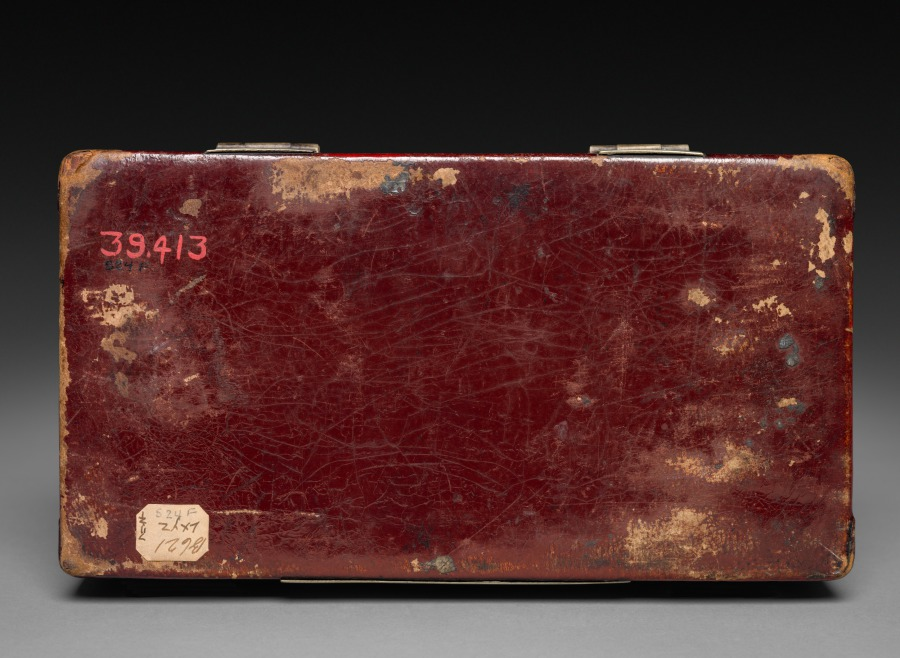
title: Box with Hinged Lid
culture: Japan, Edo period (1615–1868)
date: 1700s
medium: lacquer; metal hinges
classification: Lacquer